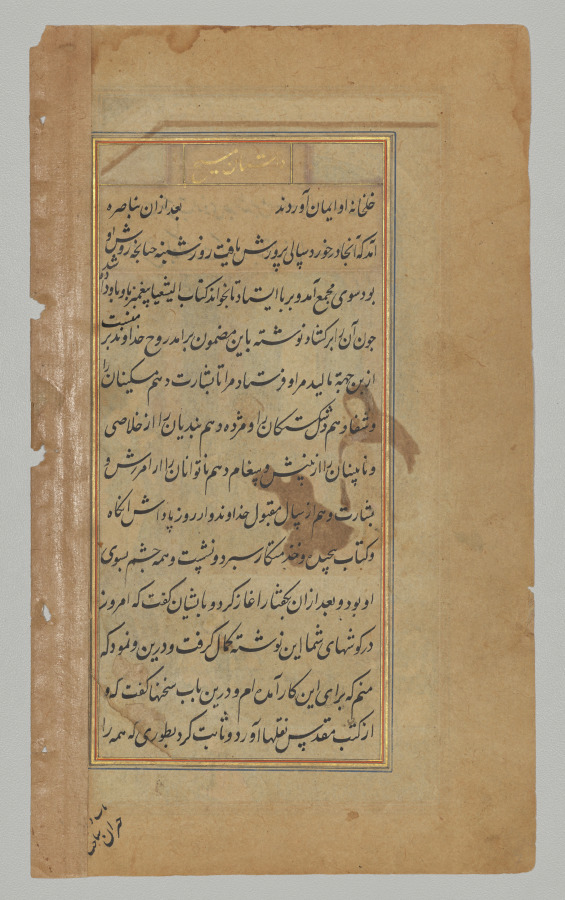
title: Text page from a Mirror of Holiness (Mir’at al-quds) of Father Jerome Xavier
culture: Mughal India, Allahabad, made for Prince Salim (1569–1627)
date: 1602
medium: Ink and gold on paper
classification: Manuscript